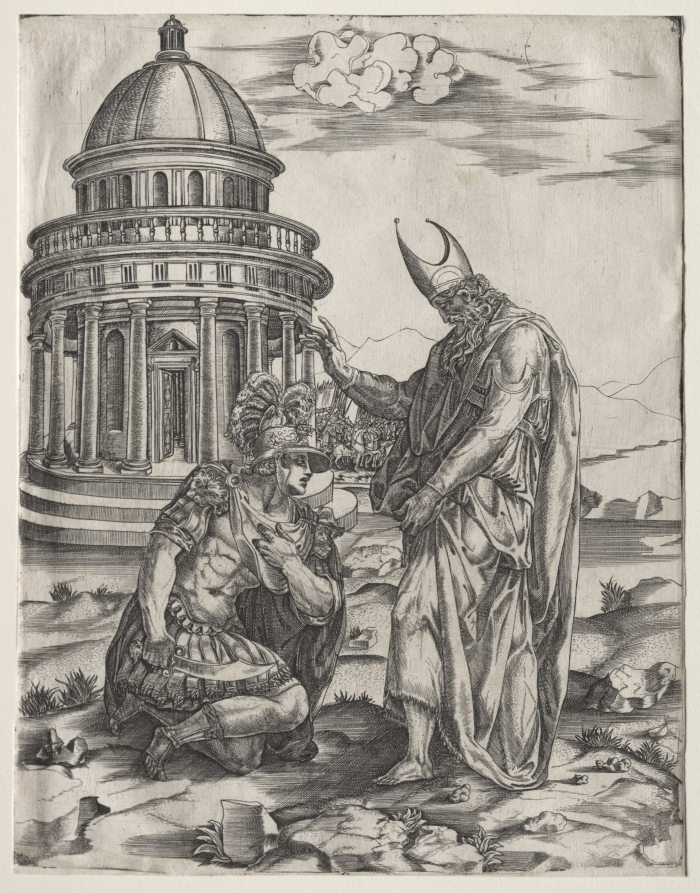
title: Alexander the Great and the High Priest of Jerusalem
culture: Italy, 16th century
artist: Master IRs (Italian)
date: mid 1540s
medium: engraving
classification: Print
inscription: VERSO, lower left, in graphite: B XV[underlined] ·22·1 ; lower center, in pen and gray-brown ink: G.[...]ck a [N...ro?] 1802. / In. N° 12617 ; lower center, in graphite: SC 11276 ; lower right, in graphite: 1883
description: According to ancient legend, when Alexander the Great (356–323 BC) came into the presence of the high priest of Jerusalem, he was so awestruck by the priest's piety that he approached the holy man on his knees.